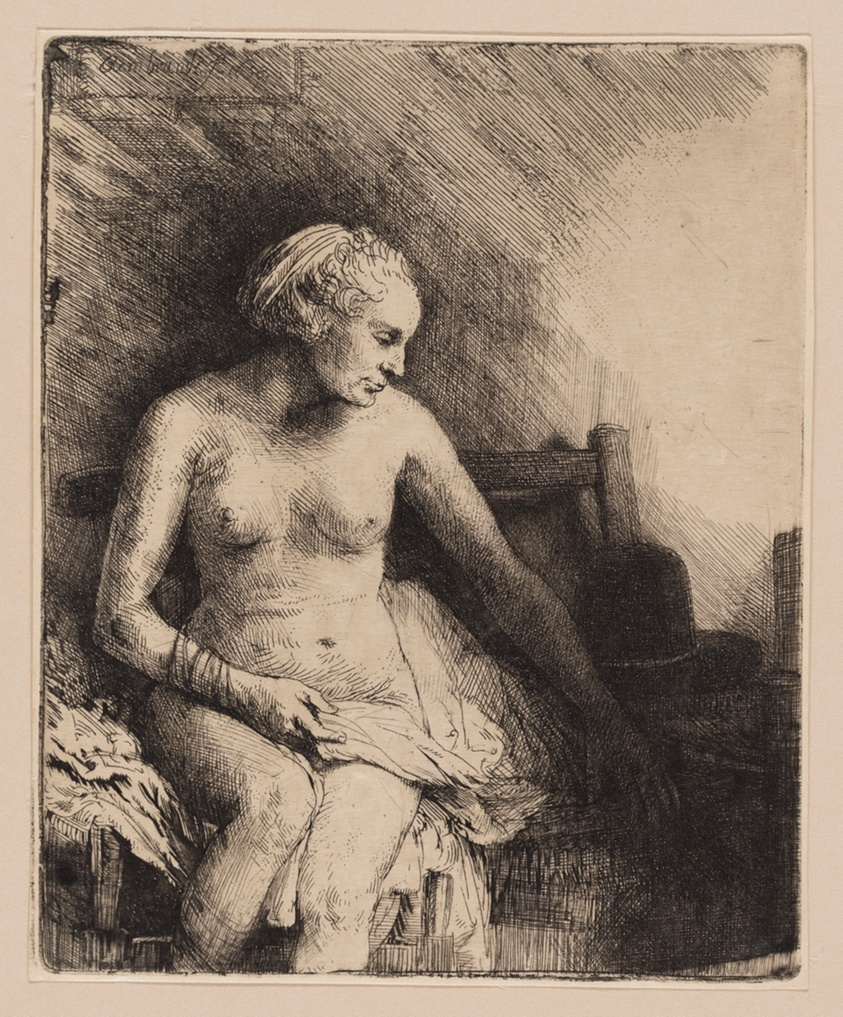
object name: Print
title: Woman at the Bath with a Hat Beside Her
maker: Rembrandt van Rijn (Dutch, 1606-1669)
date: 1658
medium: Etching and drypoint in black on ivory Japanese paper, laid down on ivory Japanese paper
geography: Netherlands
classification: etching; paper; print; prints and drawing; drypoint